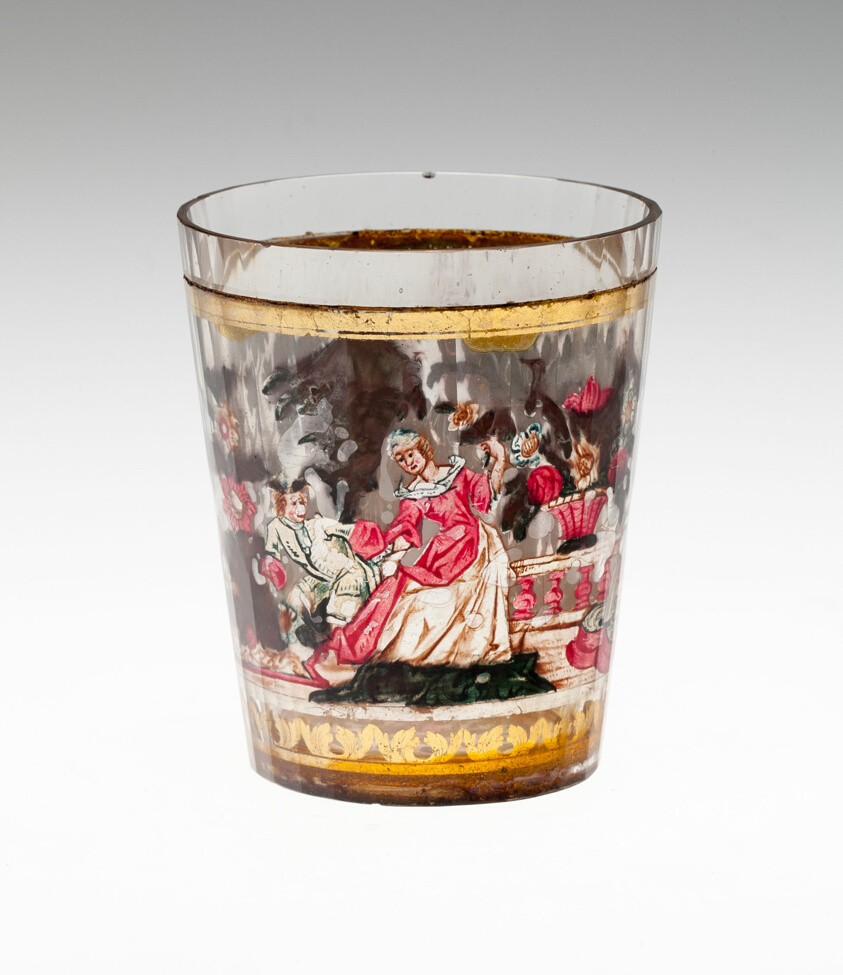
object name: Glass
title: Beaker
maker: Bohemia, Czech Republic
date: c. 1730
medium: Glass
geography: Bohemia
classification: drinking vessel; glass; european decorative arts